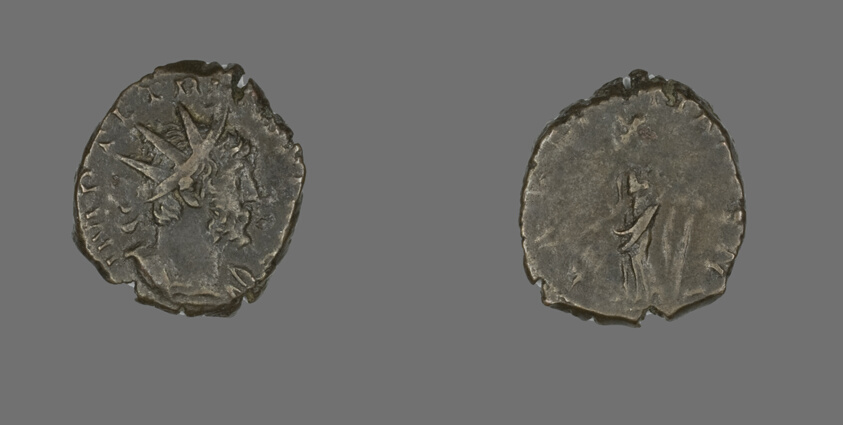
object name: Coin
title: Antoninianus (Coin) Portraying Emperor Tetricus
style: roman (ancient, style or period), ancient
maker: Roman; minted in Gaul (now France)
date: 271-274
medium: Billon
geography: Roman Empire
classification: coin; ancient art